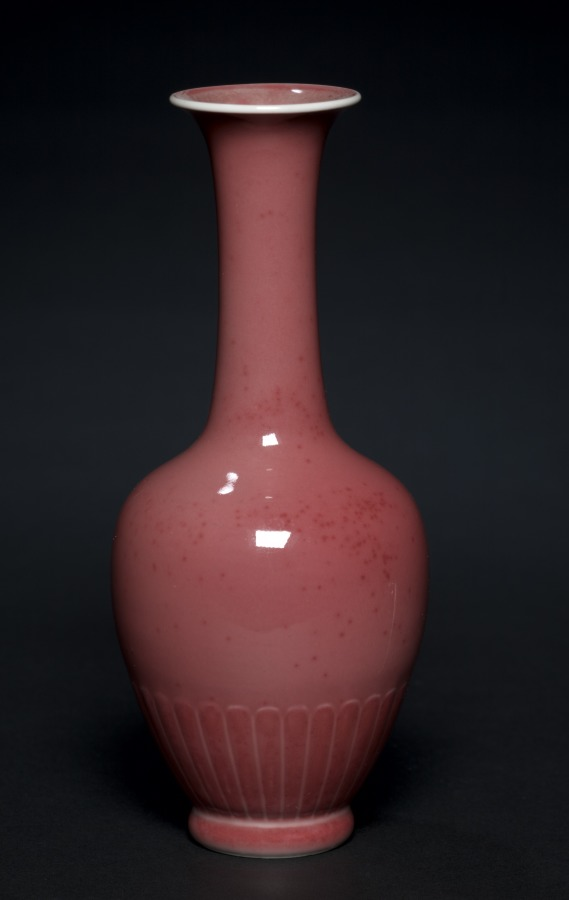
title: Lotus Petal Vase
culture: China, Jiangxi province, Jingdezhen, Qing dynasty (1644-1911), Kangxi period (1662-1722)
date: 1662–1722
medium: porcelain with "peach bloom" glaze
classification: Ceramic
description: The "peach-bloom" glaze developed during the Kangxi era has also been described as "drunken with beauty." Technical achievements were transcended with aesthetic associations, revealing the greatest sensitivity to all things beautiful in nature.